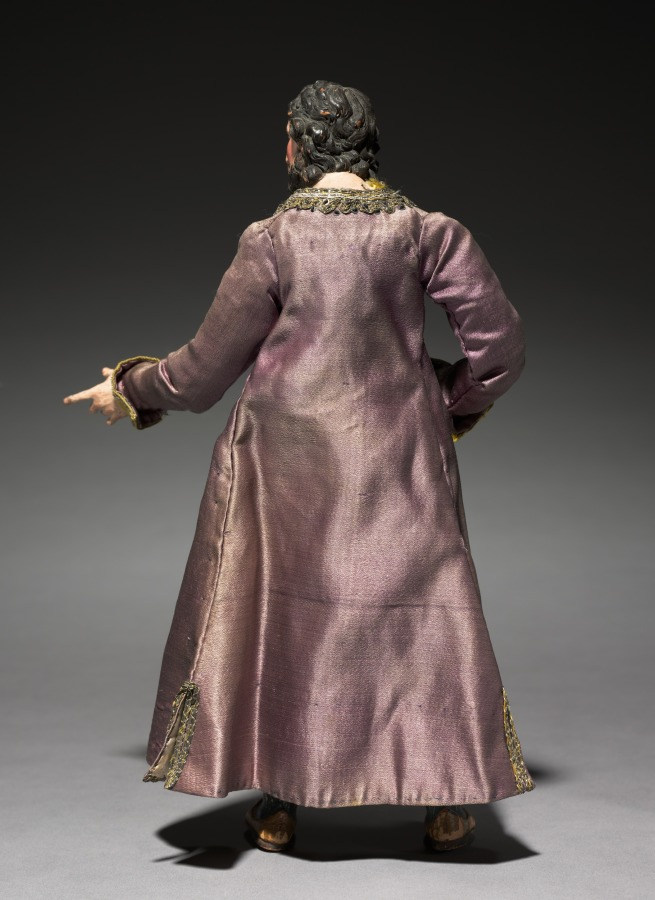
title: Figure from a Crèche: Standing Man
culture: Italy, Naples, late 18th-early 19th century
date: 1780–1830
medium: painted wood and terracotta with various textiles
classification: Sculpture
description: The practice of creating scenes of the Nativity for the home dates from the early 1700s in Italy, where people began to set up doll-like figures of about a foot or less in height. The custom was particularly popular in Naples around 1800, where crèche scenes (crèche means cradle, or crib) included many figures, whose heads and hands of painted terracotta, stuffed cloth bodies, and clothing adapted from contemporary local costumes gave them an amazingly realistic character. Representations of the birth of Jesus can be traced to the first few centuries of Christianity. Both living creatures and sculptural depictions of them were used from early times. By the late middle ages it was customary to create life-size figures of wood or stone, naturalistically painted, to represent the characters who participated in the events of Jesus's early life. These sculptures were then arranged in scenes illustrating one or both of the most important of these events, the Adoration of the Shepherds and the Adoration of the Magi—the three kings from the East who came to pay homage to the Christ child. Used in churches, these large figures were especially popular in Italy, Central Europe, Spain, and Portugal.